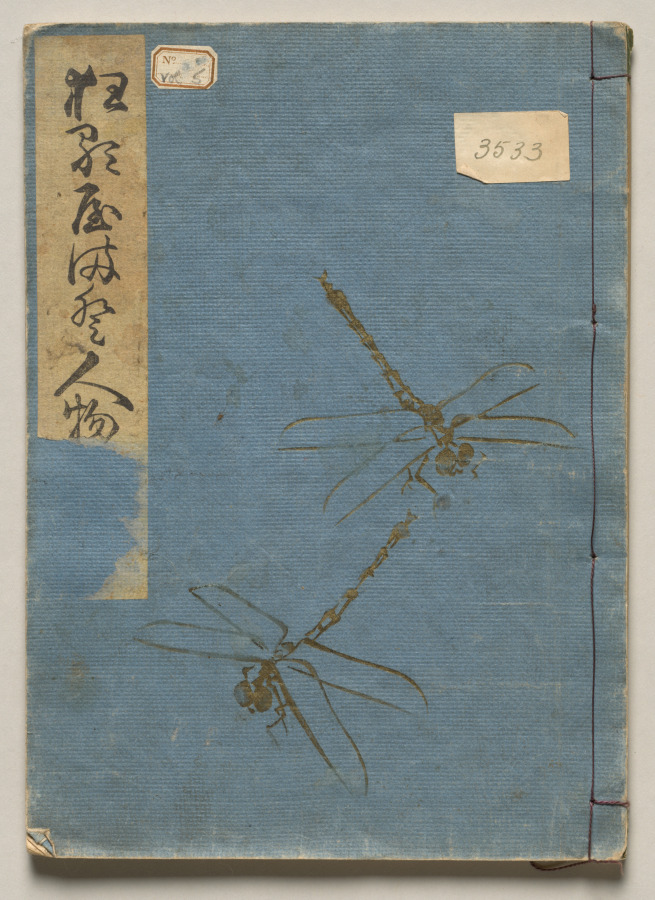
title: Volume Five of People of Japan in Light Verse (Kyōka)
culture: Japan, Edo period (1615–1868)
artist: Utagawa Hiroshige (Japanese, 1797–1858)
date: 1857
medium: Woodblock-printed book; ink and color on paper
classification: Bound Volume